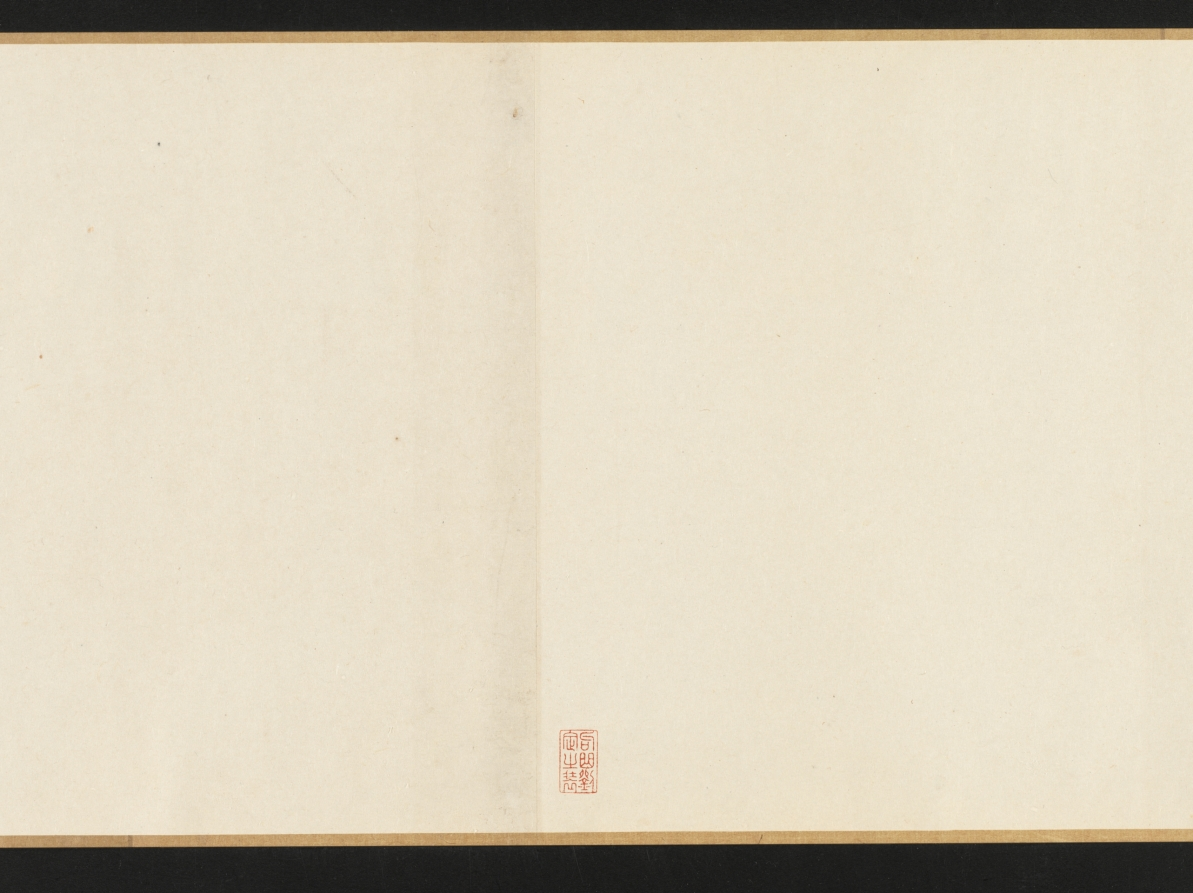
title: The Lantern Night Excursion of Zhong Kui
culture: China, Yuan dynasty (1271-1368)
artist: Yan Hui (Chinese, active 1270–1310)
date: late 1200s–early 1300s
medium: handscroll; ink and slight color on silk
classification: Painting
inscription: Artist's signature [and probable seal]: Yan Qiuyue 顏秋月 Title on frontispiece and 1 seal of Niu Shuyu 鈕樹玉 (1760–1827): Qiuyue mohuan 秋月墨幻 [Qiuyue's Ink Fantasy]. 31 additional seals: 2 of Yang Shiqi 楊士奇 (1365–1444); 2 of An Guo 安國 (1481–1534); 8 of Xiang Yuanbian 項元汴 (1525–1590); 2 of Geng Zhaozhong 耿昭忠 (1640–1686); 4 of Pu Tung 溥侗 (1870–1952); 7 of Tan Jing 譚敬 (1911–1991); 1 of Liu Ting-chih (20th c.); 5 unidentified.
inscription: An inscription by Zizhi Shanren 紫芝山人 [probably Jiang Hui 蔣惠], dated 1389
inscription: An inscription by Wu Kuan 吳寬 (1436–1504)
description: Here, the demon queller Zhong Kui leads a nightly procession of street entertainers with bare, muscular bodies and demonic faces. Some wear shabby clothes, and all perform stunts and tricks to astound and scare the viewer. In fact, a New Year custom in cities of southeast China had the poor, disguised as demons, process through the streets and play their tricks to clear households of evil spirits and welcome the spring. From right to left, a demonic figure leads the procession and beats a drum; another lifts a large rock; one stands on his hands trying to drink; one balances a jar on his elbow; three hold and wield weapons; one carries a folded chair covered by a cow’s skin; another holds Zhong Kui’s qin (zither), books, brush, and inkstone. At the end of the scroll, two figures offer a cup and bottle of wine to Zhong Kui, who lifts his hand in command.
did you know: Zhong Kui was an ancient ghostbuster.